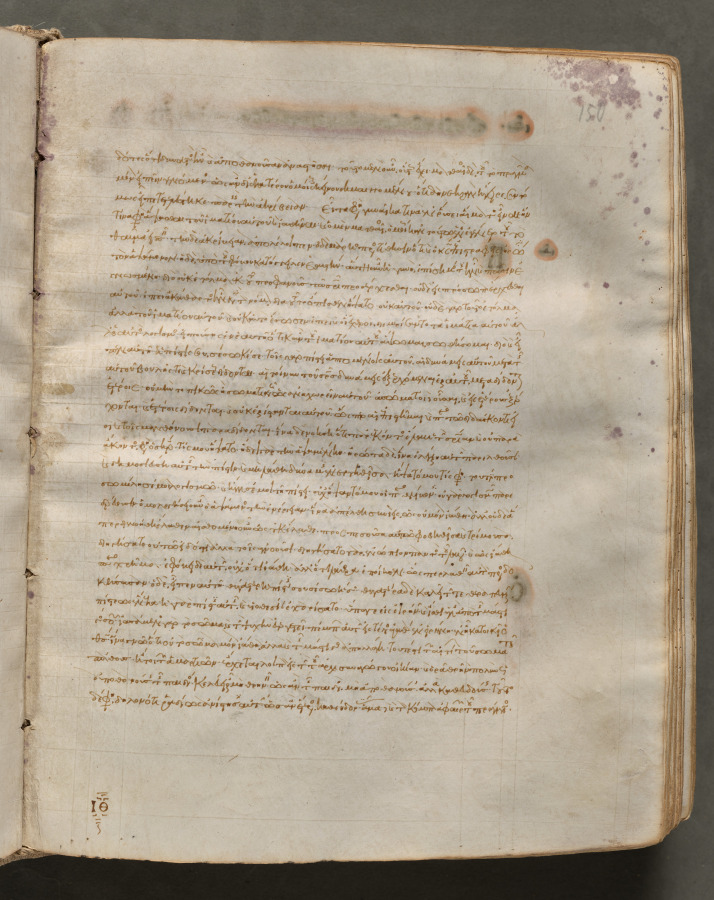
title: Text, folio 150 (recto), from a Gospel Book with Commentaries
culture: Byzantium, Constantinople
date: c. 1000–1100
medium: ink, tempera, and gold on vellum; leather binding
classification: Bound Volume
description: Each of the four gospels in this book opens on a page with brilliantly illuminated borders depicting the author of the text as well as birds-principally peacocks, symbols of the immortality of the soul-and fountains, representing the fountain of life and the salvation of the soul. This volume consists of 428 leaves with texts in Greek. Its level of sophistication suggests that it was probably written and decorated in a monastery in Constantinople.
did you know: Gospel Books were carried in procession through Byzantine churches.